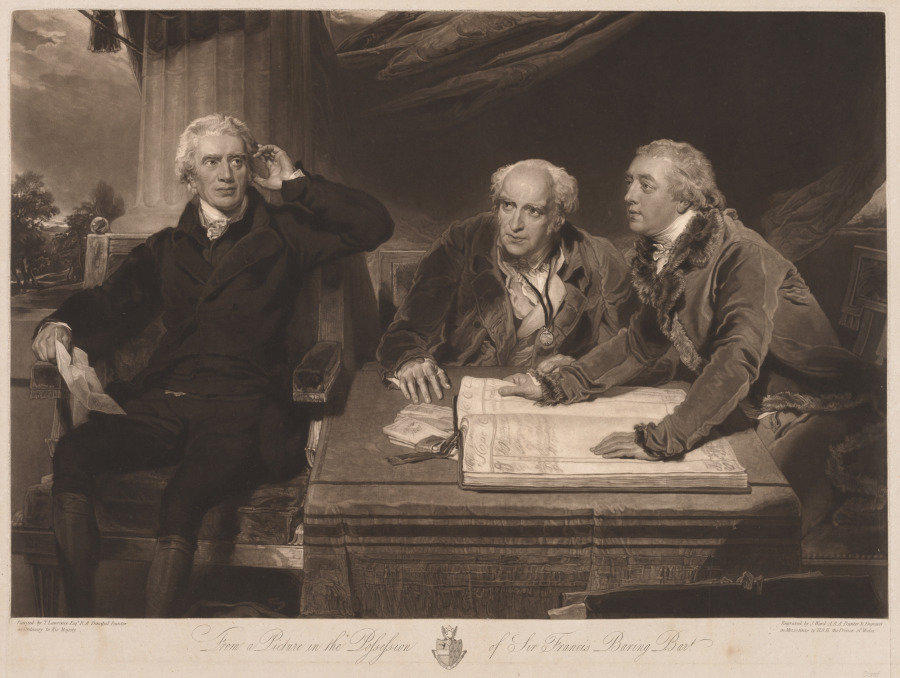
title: Sir Francis and John Baring and Charles Wall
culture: England, 19th century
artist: James Ward (British, 1769–1859)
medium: mezzotint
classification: Print